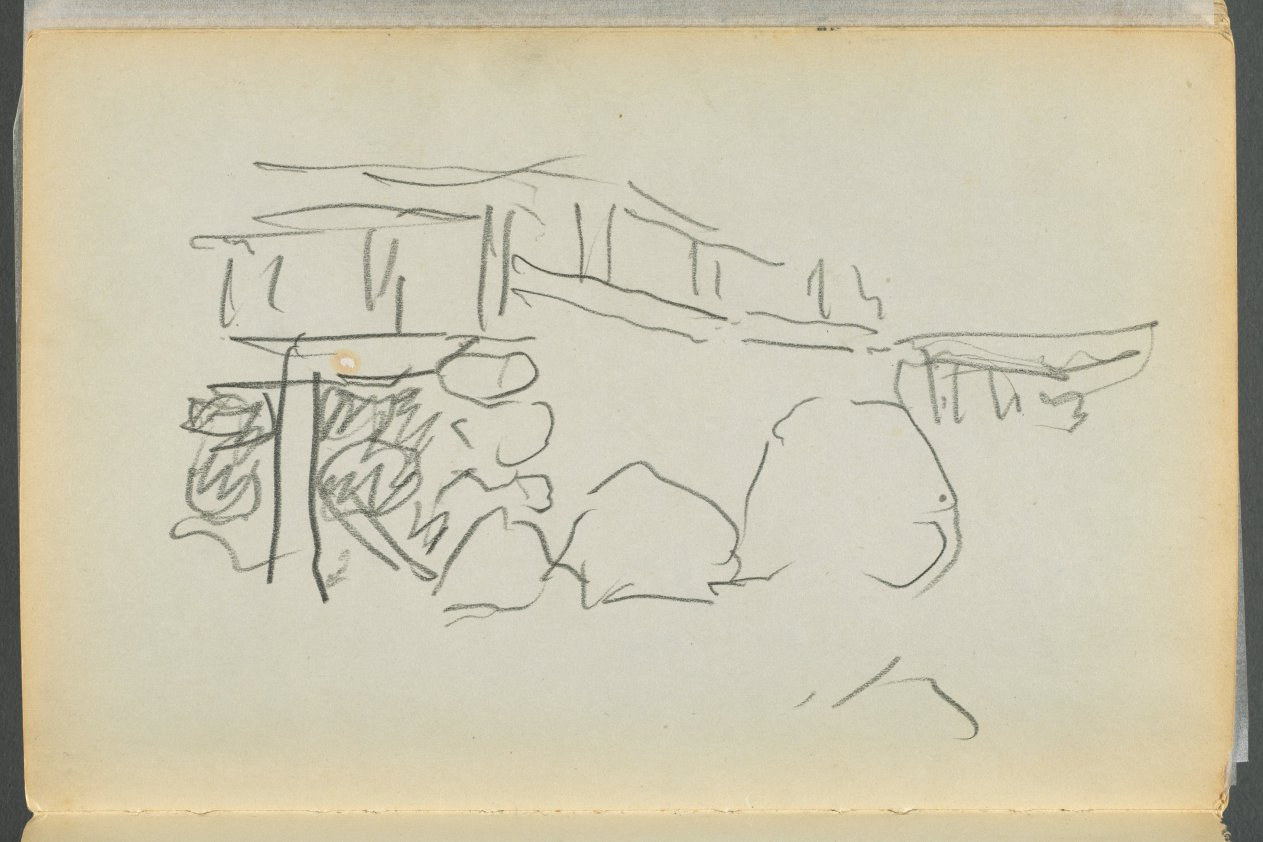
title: Sketchbook- The Granite Shore Hotel, Rockport, page 178: Fence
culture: America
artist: Maurice Prendergast (American, born Newfoundland [now Canada], 1858–1924)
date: 1905–10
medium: graphite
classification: Bound Volume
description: This sketchbook contains 72 pages of pencil drawings and 9 watercolors of Cape Ann. On the inside of the cover Prendergast wrote the address of the Granite Shore Hotel in Rockport, Massachusetts.